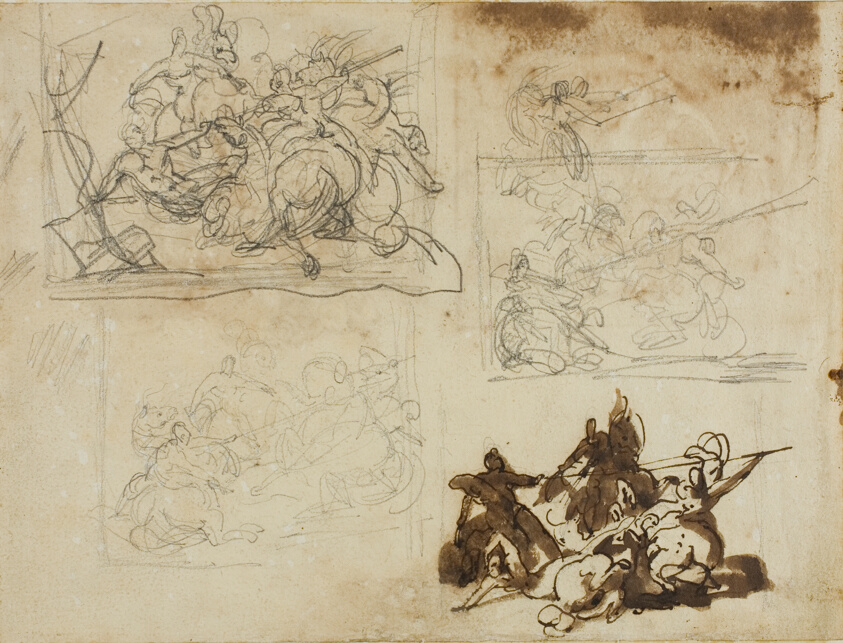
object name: Drawing and Watercolor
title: Four Sketches for a Cavalry Battle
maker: Jean Louis André Théodore Géricault (French, 1791-1824)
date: 1813/14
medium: Graphite with pen and brown ink and brush and brown wash on cream wove paper, perimeter mounted on ivory laid paper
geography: France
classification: drawings (visual works); prints and drawing